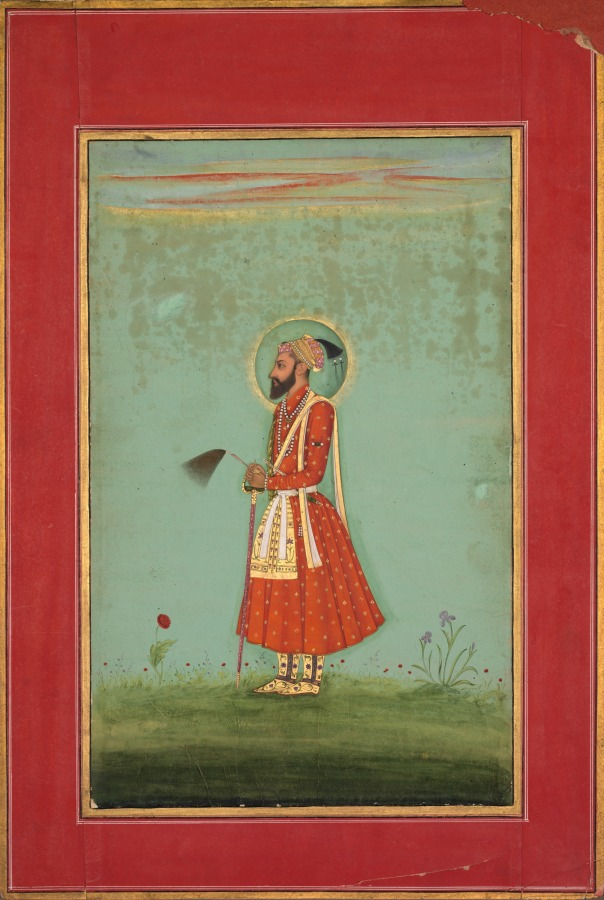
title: Aurangzeb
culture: India, Mughal Dynasty (1526-1756)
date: c. 1770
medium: color on paper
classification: Painting